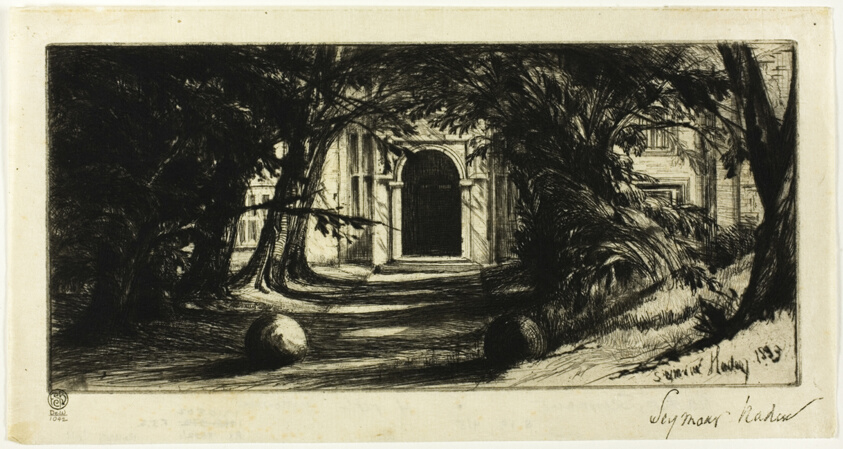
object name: Print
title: Mytton Hall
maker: Francis Seymour Haden (English, 1818-1910)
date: 1859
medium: Etching on ivory laid paper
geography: England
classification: etching; print; prints and drawing